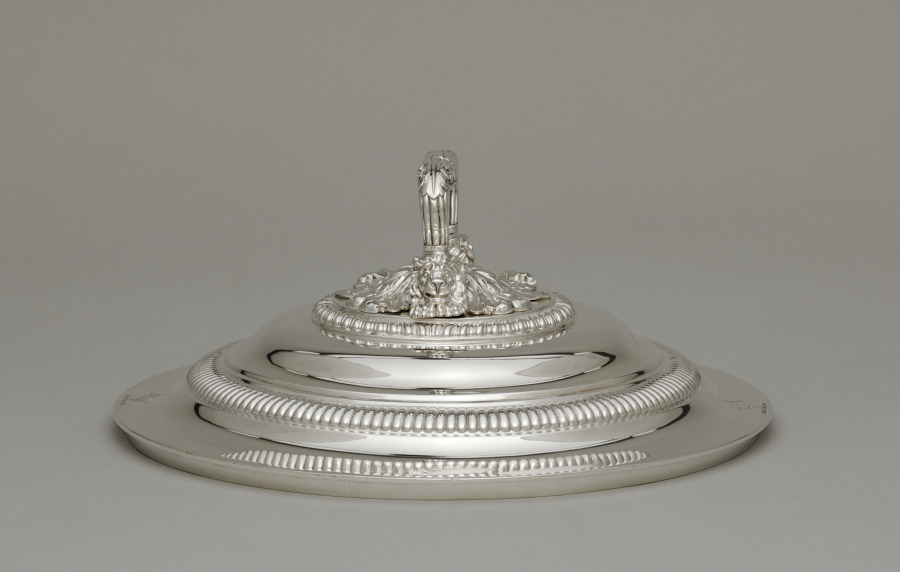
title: Cover for a Tureen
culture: England, London, 19th century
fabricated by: Paul Storr (British, 1771–1844)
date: 1812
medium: silver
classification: Silver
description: Silver fulfilled a prominent role in projecting wealth, status, power, and ritual in British life during the 1600s and 1700s. Elaborate forms such as this tureen cover, with its lionhead finials, acanthus leaves, and fluted detailing, not only represented wealth in its sheer silver weight but also provided royal and aristocratic owners a surface for displaying engraved coats of arms. The arms of the High Sheriff of Yorkshire, Timothy Hutton and his wife Elizabeth Chaytor of Spennithorne Hall in northern England are engraved on the accompanying tureen and stand by Paul Storr, one of the most prominent London silversmiths of the period.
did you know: This is a cover for a tureen. See cover record.